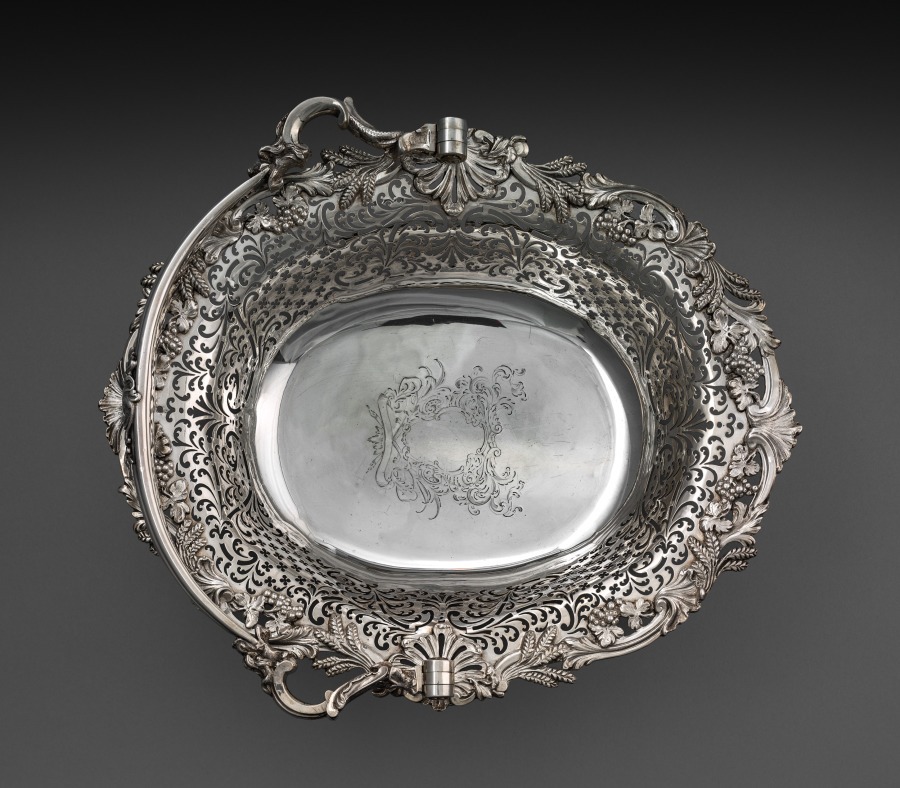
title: Cake Basket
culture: Britain, London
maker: Samuel Herbert and Company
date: 1753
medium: Silver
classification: Silver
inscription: “H/I I”; hallmark for London, George II, Samuel Herbert and Henry Bailey, and date 1753.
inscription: “To/H.H.M./from/S.K., E.W.G., J.H.J., D.R.L., M.B.R./on the occasion of his/Silver Wedding/1911-1936”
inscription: “50-2”; hallmark for London, George II, Samuel Herbert and Henry Bailey, and date 1753.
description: Drinking tea at the end of the day, accompanied by sweet cakes and savory delights, became an established ritual in Britain at all levels of society during the 1700s. In grand houses, silver teapots, caddies, and cake baskets elevated this afternoon refreshment to a formal gathering.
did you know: Sheaves of wheat adorning the rim of this basket allude to the flour used in pastries and cakes for tea.